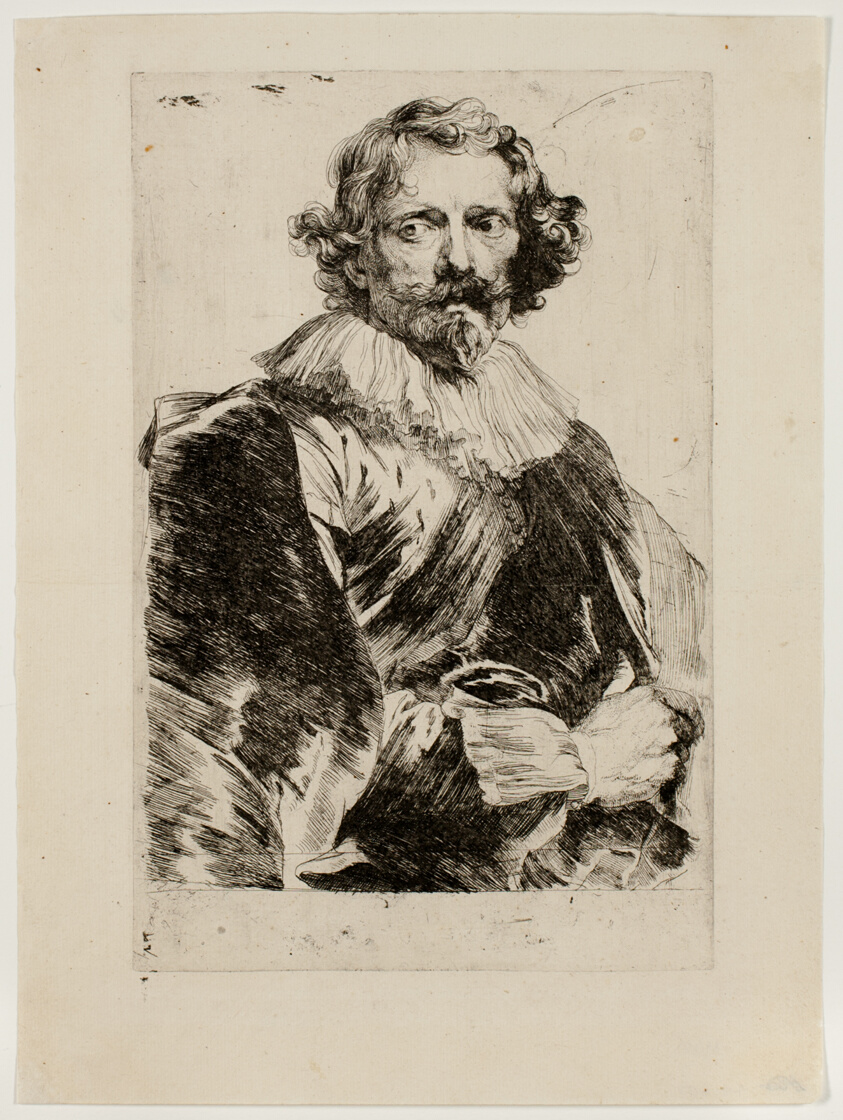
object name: Print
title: Lucas Vorsterman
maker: Anthony van Dyck (Flemish, 1599-1641)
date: 1630/33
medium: Etching in black on cream laid paper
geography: Flanders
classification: etching; print; prints and drawing